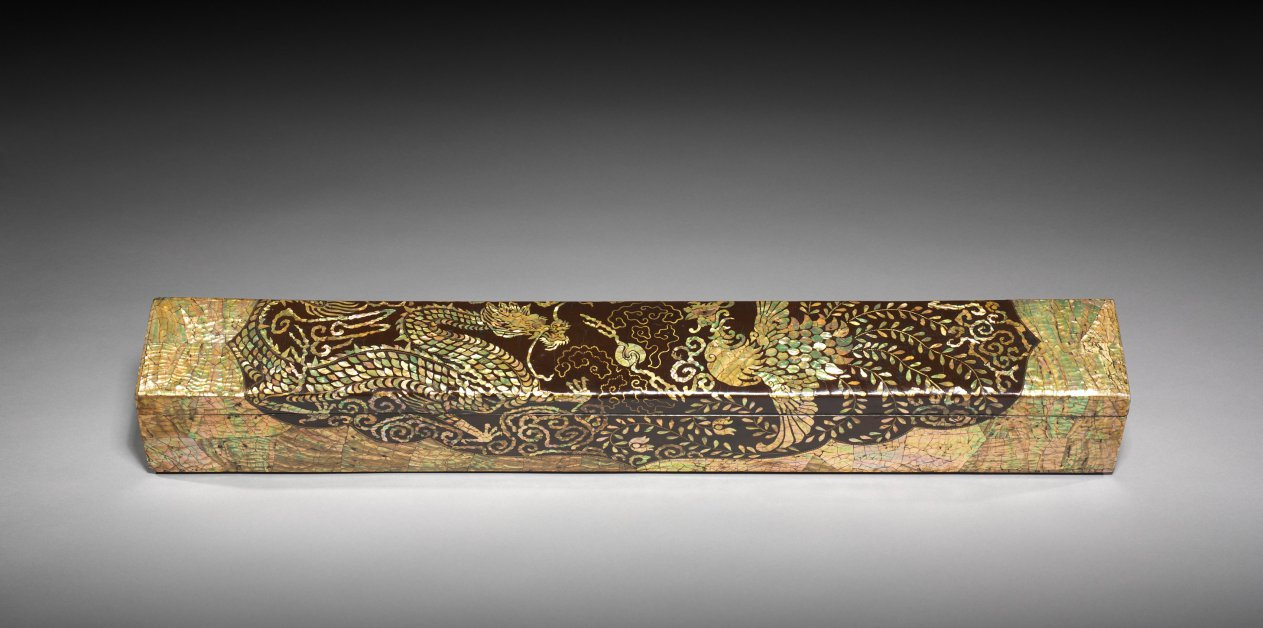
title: Scroll Box with Dragon and Phoenix Design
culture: Korea, Joseon dynasty (1392–1910)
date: 1800s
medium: lacquered wood inlaid with mother-of-pearl and twisted brass and copper wire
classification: Lacquer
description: This large rectangular box was designed for keeping a scroll or an important document. The mother-of-pearl inlaid lacquer rendering of a dragon and phoenix combines texture, color, and shape to produce a dazzling effect. The large and prominent designs of the Joseon-period inlaid lacquer, like on this box, replaced the fine detail and mosaic-like patterns popular in the Goryeo period (918-1392).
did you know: This technique of using the inlays of iridescent mother-of-pearl and abalone shells has been practiced in Korea for over a thousand years,